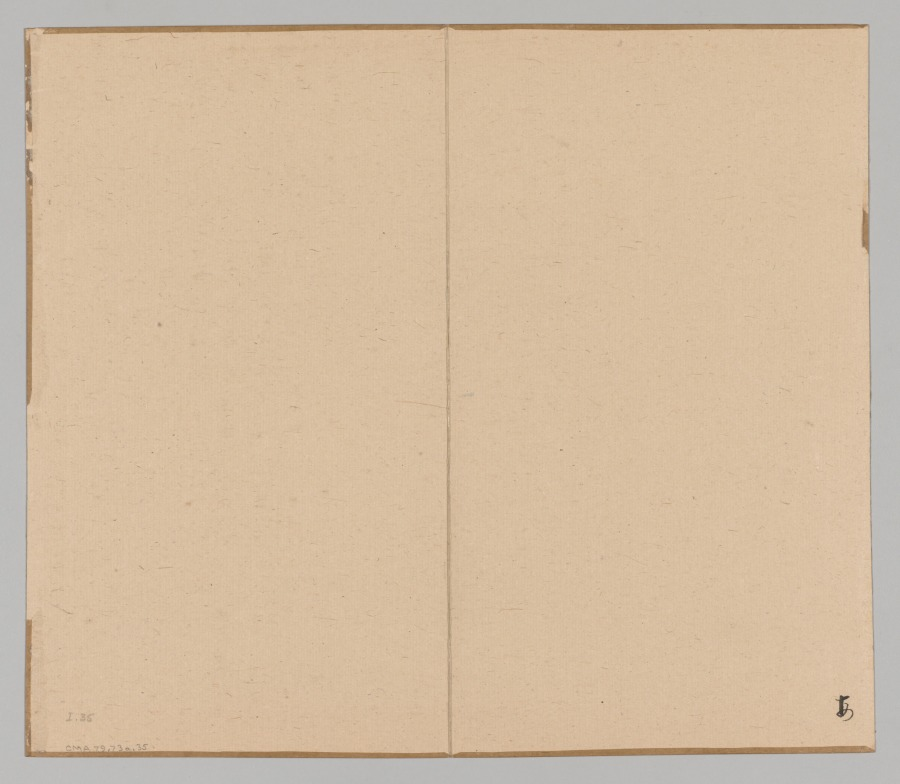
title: Reverberations of Taiga, Volume 1 (leaf 35)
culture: Japan, Edo period (1615–1868)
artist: Aoki Shukuya (Japanese, d. 1802)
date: mid- to late 1700s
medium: double-leaf from a pair of albums; ink and light color on paper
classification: Portfolio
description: Traditionally, young painters in Japan began their studies with an established master-painter. The master's compositions invariably became models that the apprentice copied to learn various ink and brush techniques. Shukuya was a pupil of the famous Kyoto artist Ikeno Taiga, whose style is reflected in these sketches of rocks, trees, and mountains.